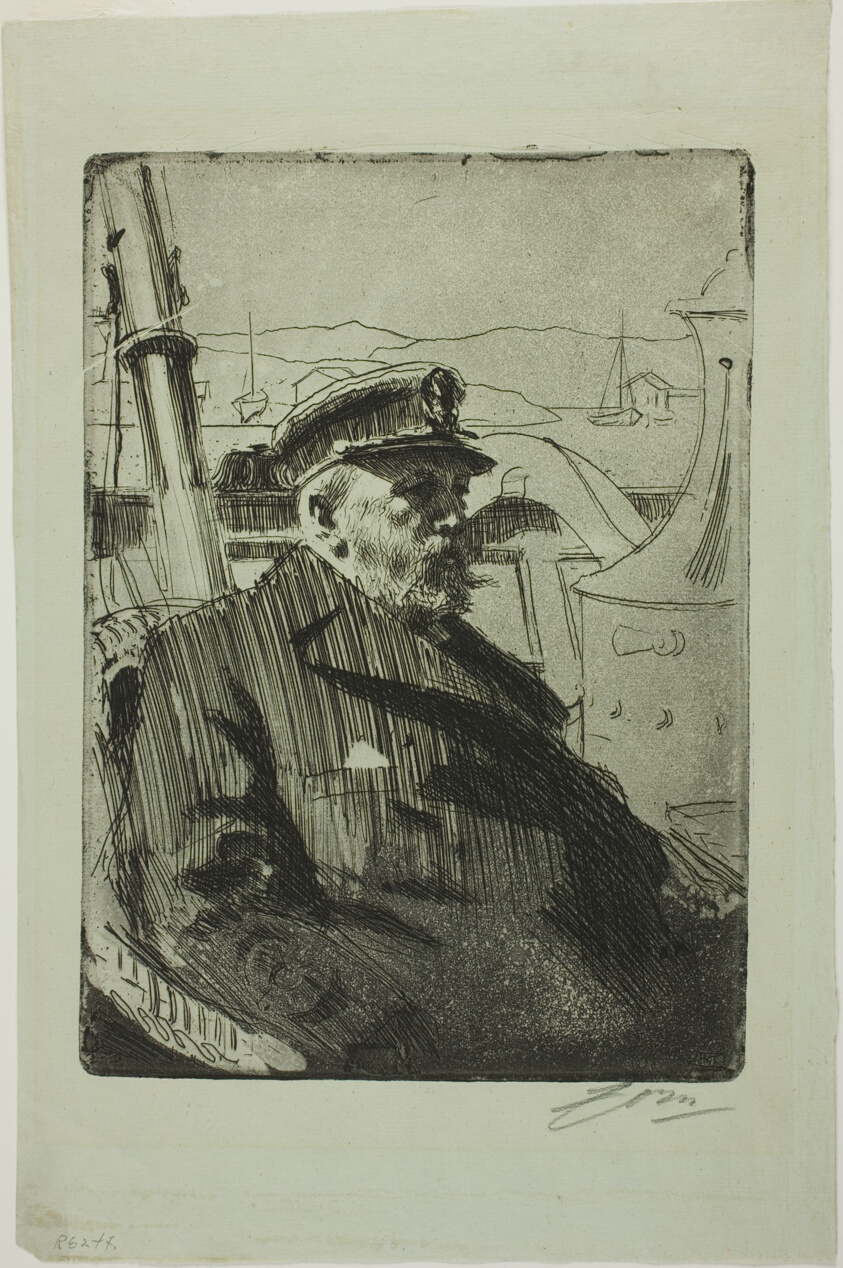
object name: Print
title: King Oscar II (Second plate)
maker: Anders Zorn (Swedish, 1860-1920)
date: 1898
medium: Etching on green laid paper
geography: Sweden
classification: engraving; print; prints and drawing